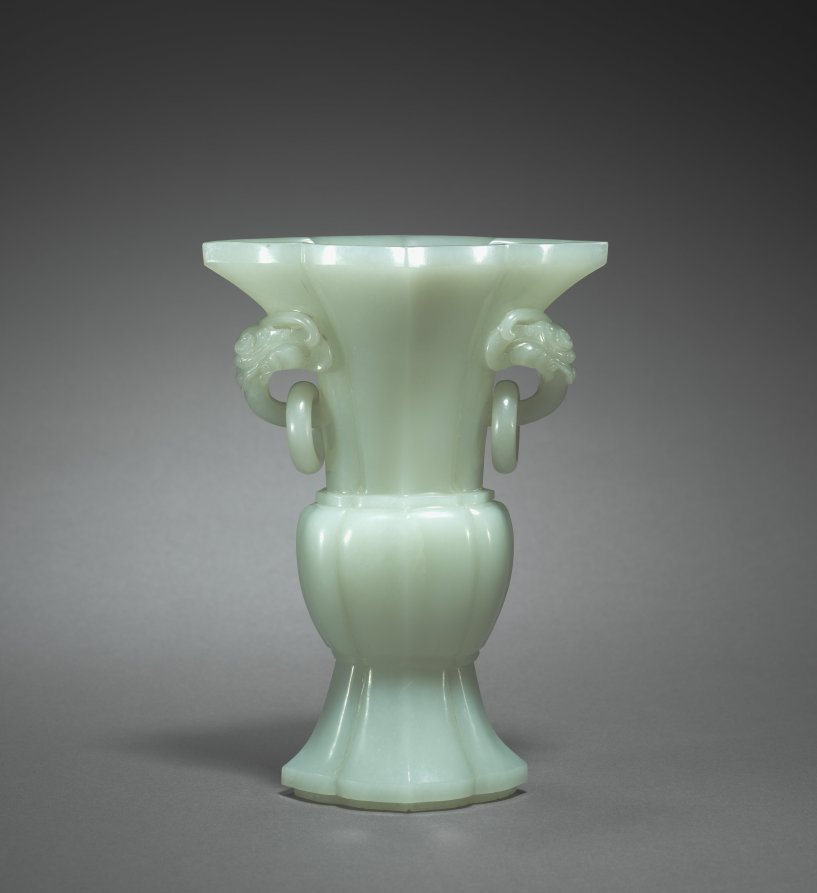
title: Vase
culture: China, Qing dynasty (1644-1911)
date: 1700s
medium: jade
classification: Jade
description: In the Ming (1368–1644) and Qing (1644–1911) dynasties, luxury items became more affordable to larger parts of the society, including women, merchants, and literati in non-official positions. Imperial patronage and a growing urban population encouraged consumption of luxury goods and local craftmanship. This jade vase has free ring handles suspended from a pair of feline masks. The cross-section of vase is an eight-sided lozenge with curving sides. It illustrates the superb carving skills and the creative mind of its accomplished creator, who sought clients on a competitive market.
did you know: This jade vase's flaring lip, central band, and flaring foot are derived from archaic bronze zun.